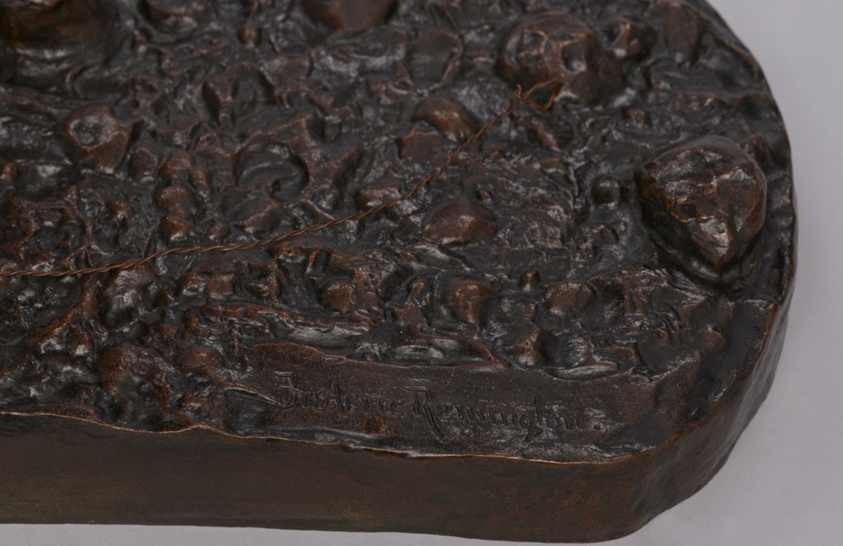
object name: Sculpture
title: The Bronco Buster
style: 19th century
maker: Frederic Remington (American, 1861–1909); Cast by Henry-Bonnard Bronze Co. (American, 19th century)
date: Modeled 1895, cast 1899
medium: Bronze with brown patina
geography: United States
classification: sculpture; american arts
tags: animals, rodeos, cowboys, horses, horseback riding, people, portraits